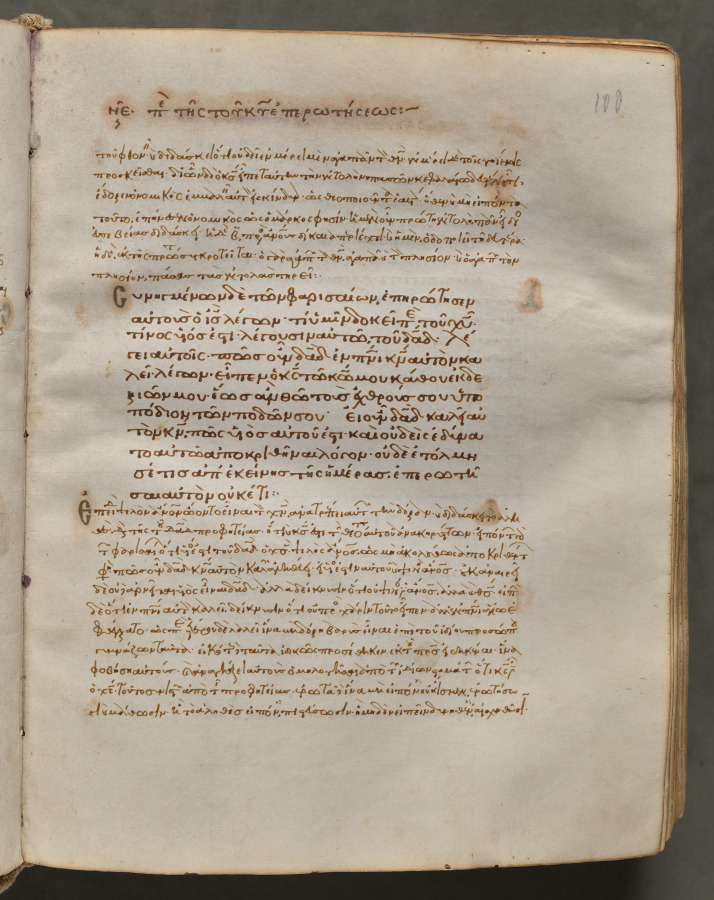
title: Text, folio 100 (recto), from a Gospel Book with Commentaries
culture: Byzantium, Constantinople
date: c. 1000–1100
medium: ink, tempera, and gold on vellum; leather binding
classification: Bound Volume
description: Each of the four gospels in this book opens on a page with brilliantly illuminated borders depicting the author of the text as well as birds-principally peacocks, symbols of the immortality of the soul-and fountains, representing the fountain of life and the salvation of the soul. This volume consists of 428 leaves with texts in Greek. Its level of sophistication suggests that it was probably written and decorated in a monastery in Constantinople.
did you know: Gospel Books were carried in procession through Byzantine churches.